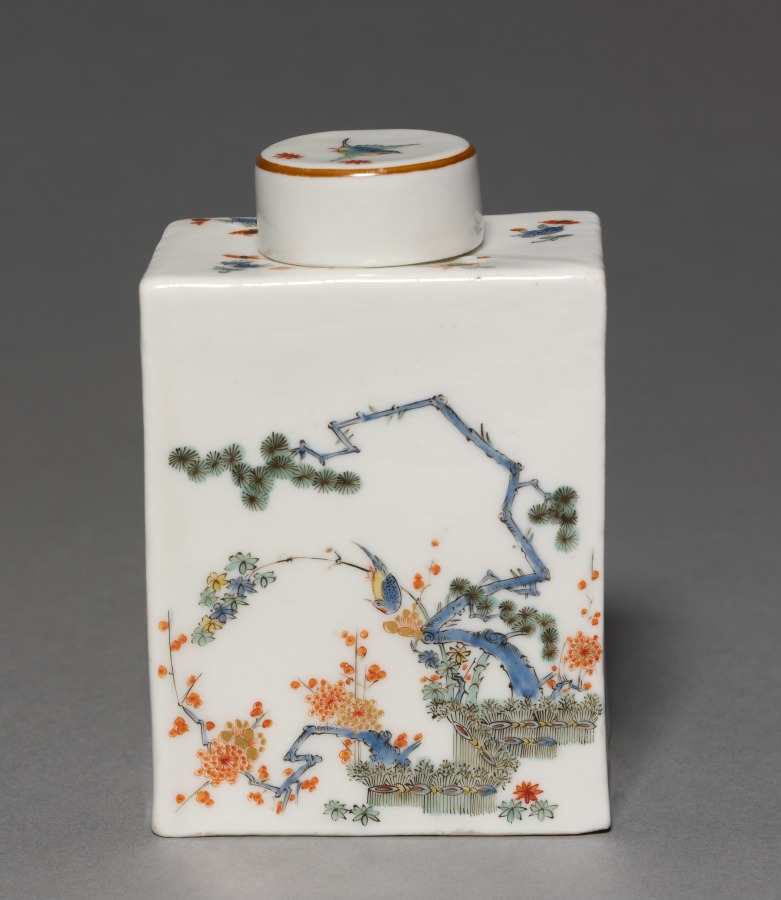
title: Tea Caddy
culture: Germany, Meissen, 18th century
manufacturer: Meissen Porcelain Factory (German, est. c. 1710)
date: c. 1735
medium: porcelain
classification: Ceramic